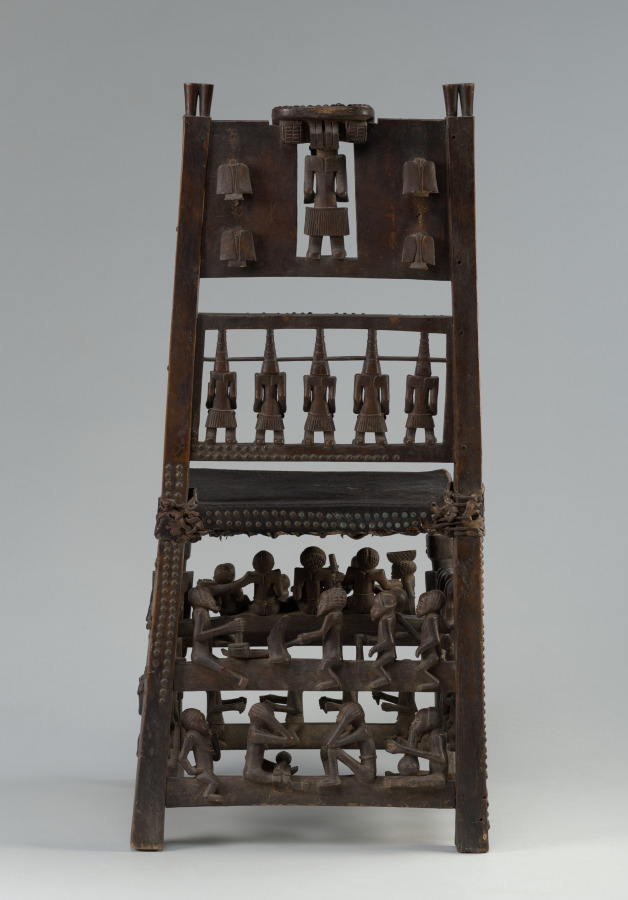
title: Ceremonial Chair or Throne (citwamo ca mangu)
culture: Africa, Central Africa, Angola, Chokwe-style carver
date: 1800s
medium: Wood, upholstery studs, leather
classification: Furniture and woodwork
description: This citwamo ca mangu chair bears over 40 sculpted figures arranged in complex compositions across the chair’s top rail (back), stretchers (rungs), and legs; all symbolize the power of Chokwe supreme chiefs. Such chairs typically bear a dozen or fewer figures. Scenes of royal life and power wrap around the seat, reinforcing how the chief and his family are at the center of their polity and its business.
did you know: Starting around the 1500s, Chokwe and other African leaders and traders received fine chairs as gifts from Portuguese traders. Chokwe leaders adapted this symbol of power as their own, using it in tandem with stools, an earlier kind of prestige seat.